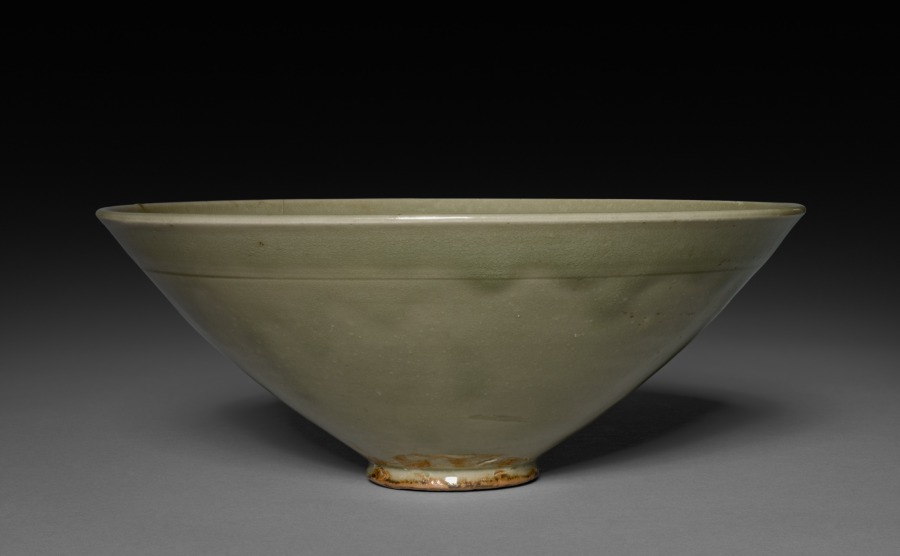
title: Bowl: Northern Celadon Ware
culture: China, Shaanxi or Henan province, Northern Song dynasty (960-1127)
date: 12th Century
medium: glazed stoneware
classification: Ceramic